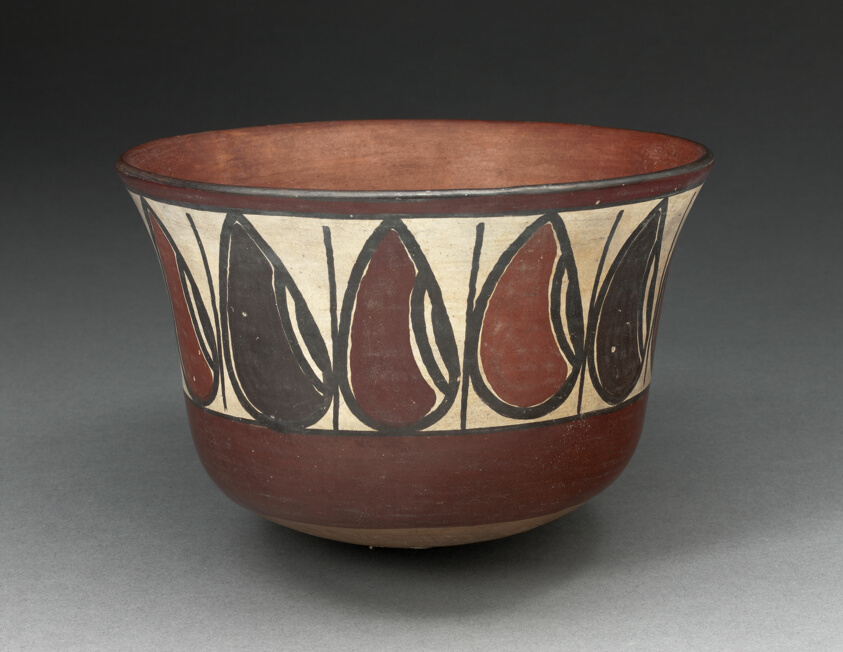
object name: Vessel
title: Bowl Depicting Band of Abstract Beans or Seeds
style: nazca, early intermediate period, Pre-Columbian, americas, Arts of the Americas, andean, andes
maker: Nazca; South coast, Peru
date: 180 BCE–500 CE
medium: Ceramic and pigment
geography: Peru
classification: bowl; earthenware; art of the americas; ceramics; vessel